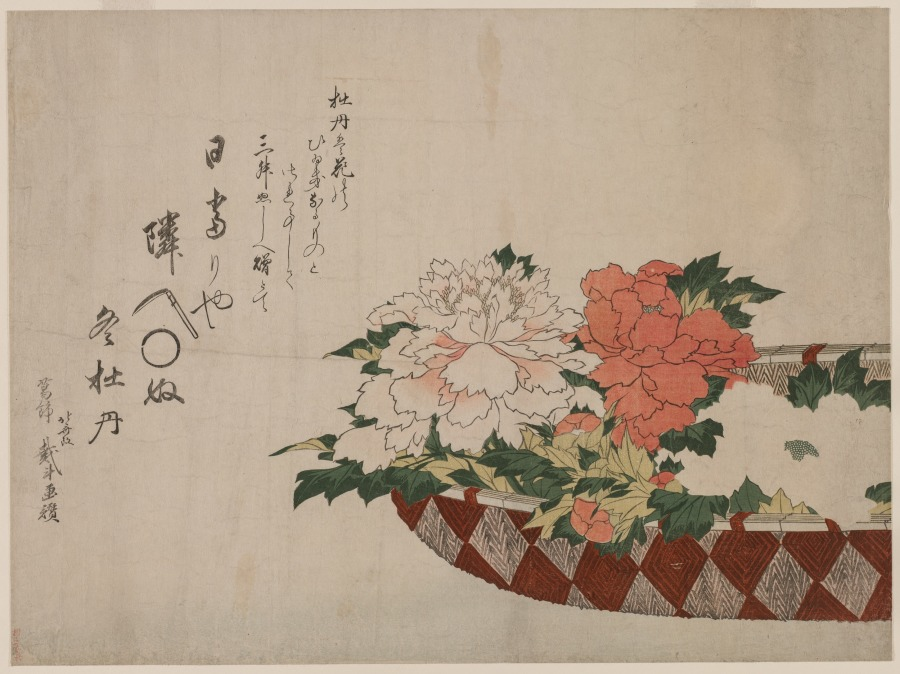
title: Basket of Peonies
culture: Japan, Edo period (1615–1868)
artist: Katsushika Hokusai (Japanese, 1760–1849)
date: 1810 or 1814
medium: color woodblock print; surimono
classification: Print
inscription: Signature: Katsushika Hokusai aratame Taito gasan Printer: Suriko Shinacho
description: A surimono is a privately commissioned print used to announce or commemorate a special event. This picture celebrates an event in the life of the actor Ichikawa Danjuro VII, whose emblem was the peony. According to Japanese tradition, the peony–one of the flowers of the four seasons–is the flower of summer.